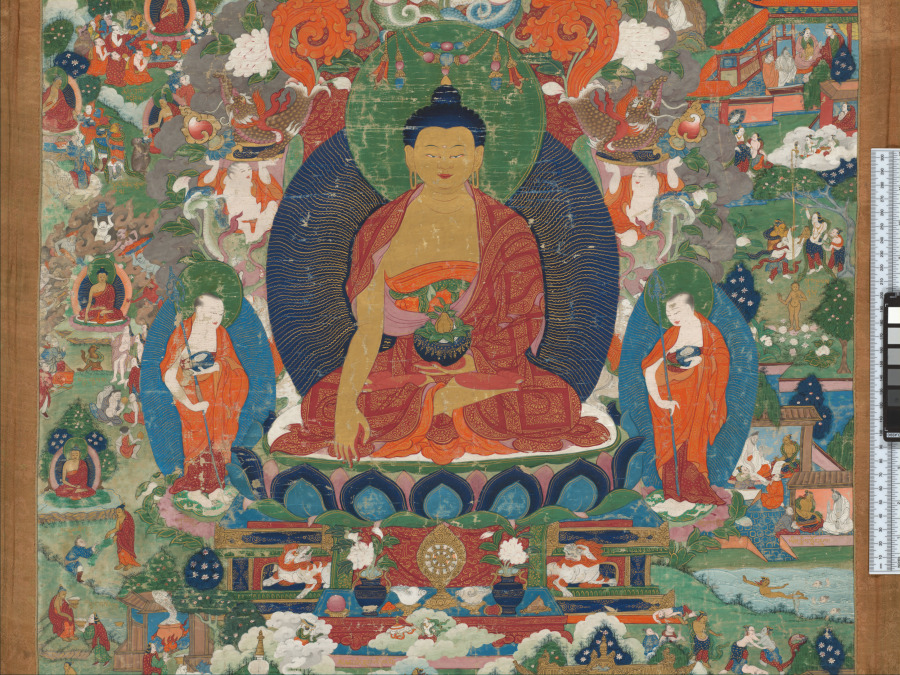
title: Shakyamuni Buddha with scenes from his life story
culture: Tibet, Qing dynasty (1644–1911)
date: c. 1700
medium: gum tempera on cloth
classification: Painting